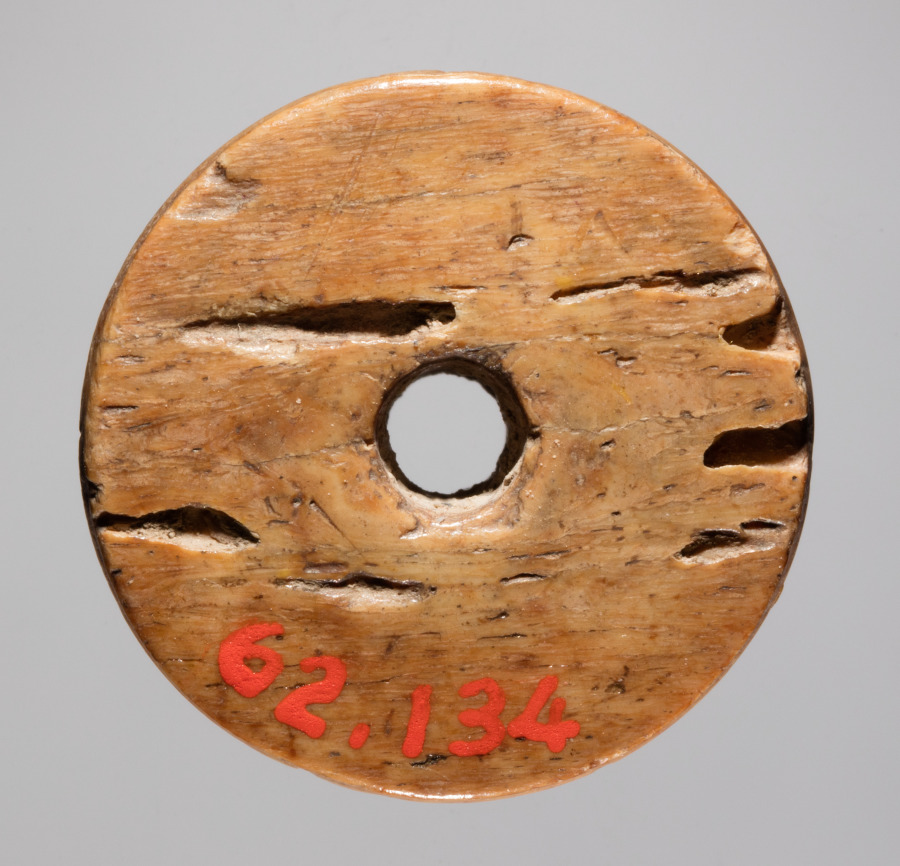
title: Spindle Whorl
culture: Iran, early Islamic period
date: 700s - 900s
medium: bone, incised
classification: Spindle Whorl